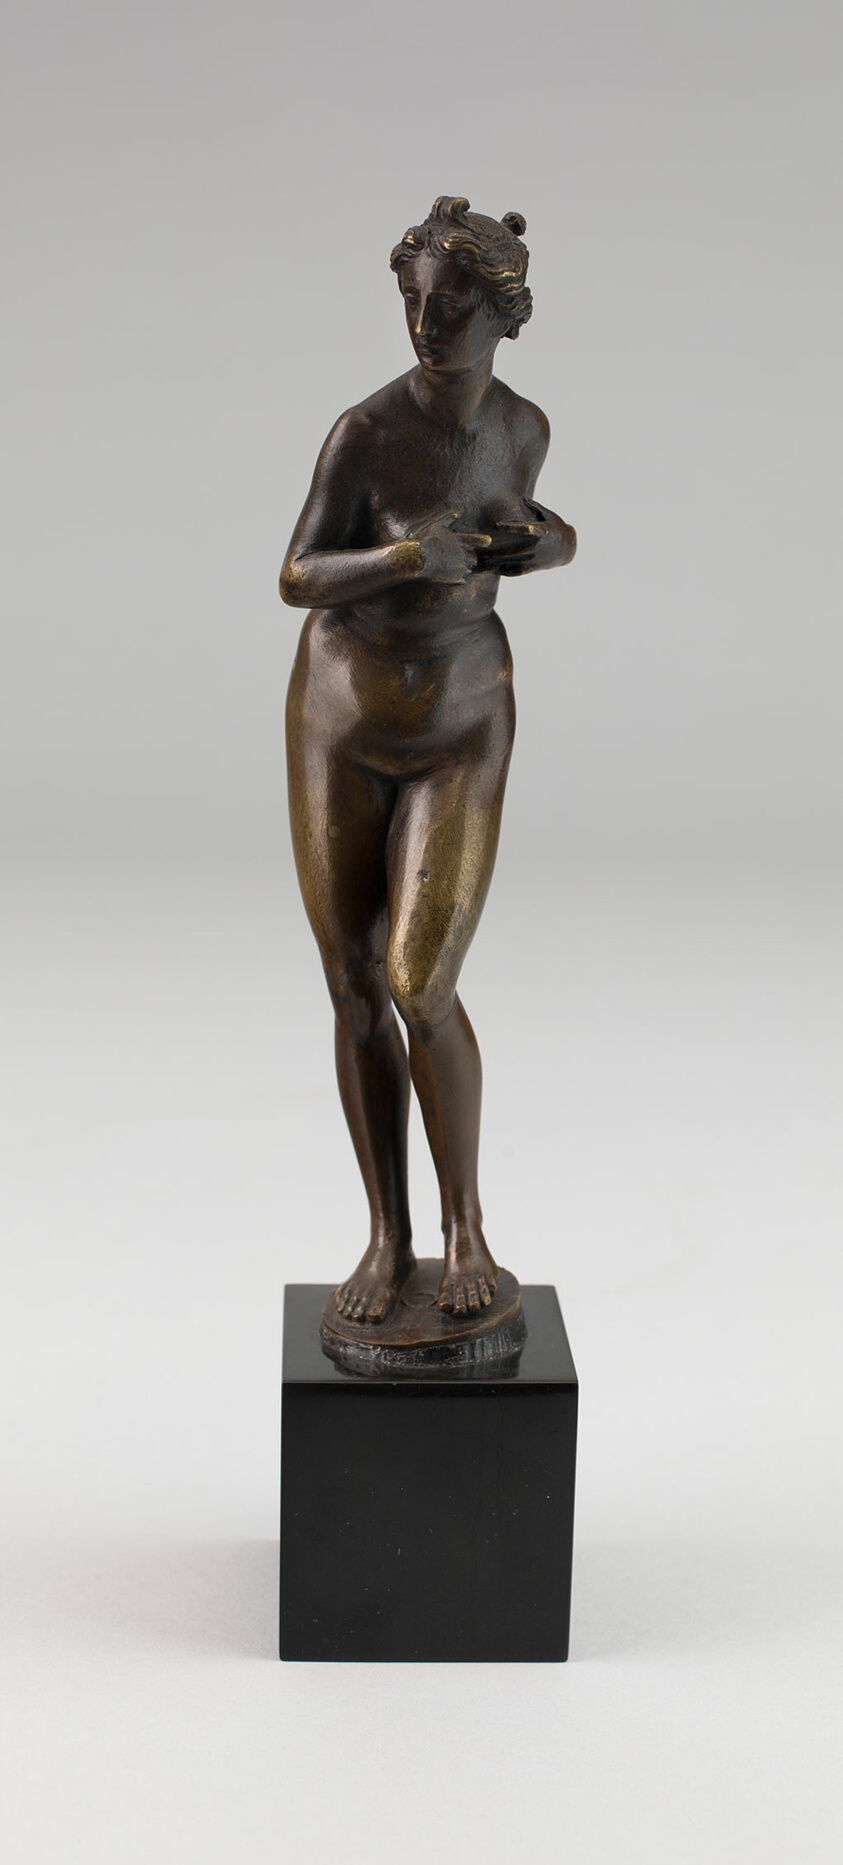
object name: Sculpture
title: Lucretia (?)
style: sixteenth century, 16th Century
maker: Attributed to Pierino da Vinci (Italian, c. 1529-1553)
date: 1547/48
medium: Bronze with yellow patina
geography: Italy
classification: statuette; sculpture; bronze; Italian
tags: woman, mythology, mythological figures, mythical, nudes